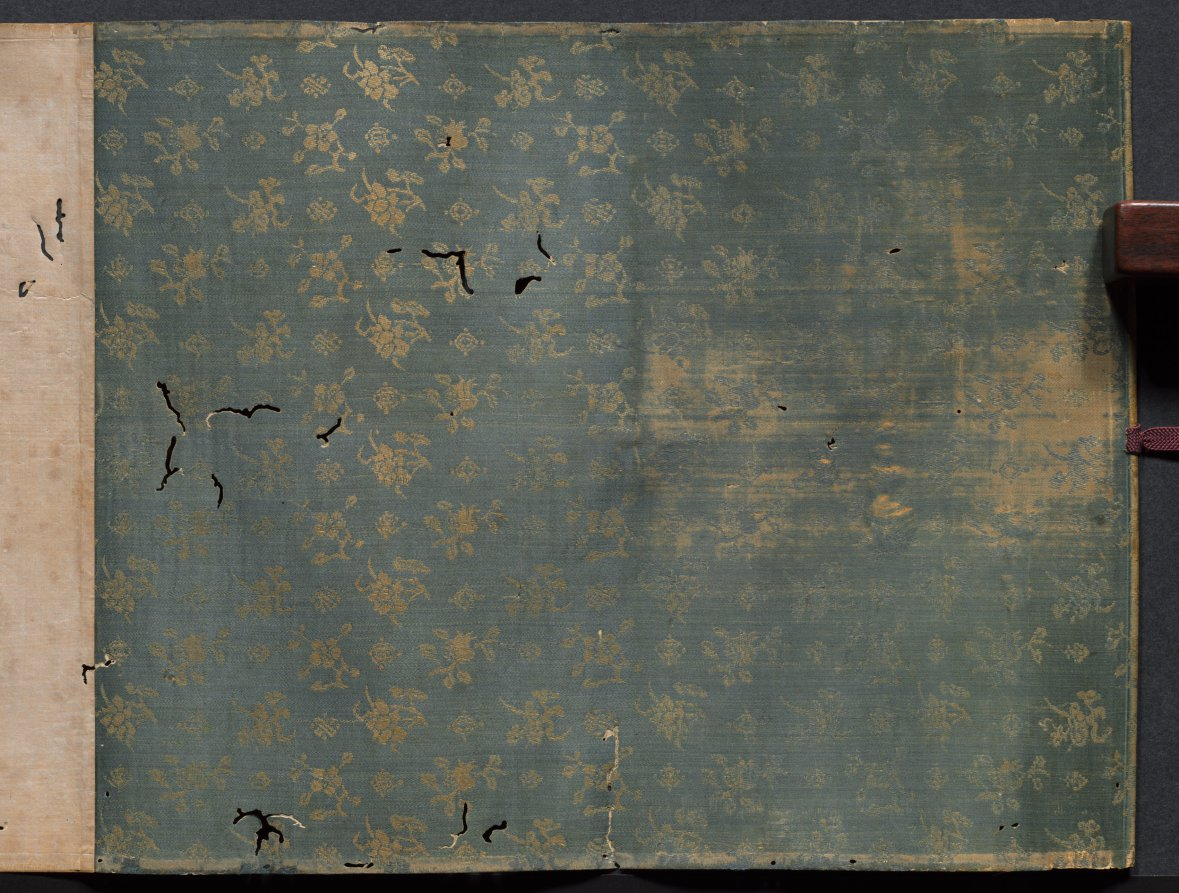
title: Eight Views of Xiao-Xiang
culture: Japan, Edo period (1615–1868)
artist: Kano Tan’yū (Japanese, 1602–1674)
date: 1615–1868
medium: handscroll; ink on silk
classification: Painting